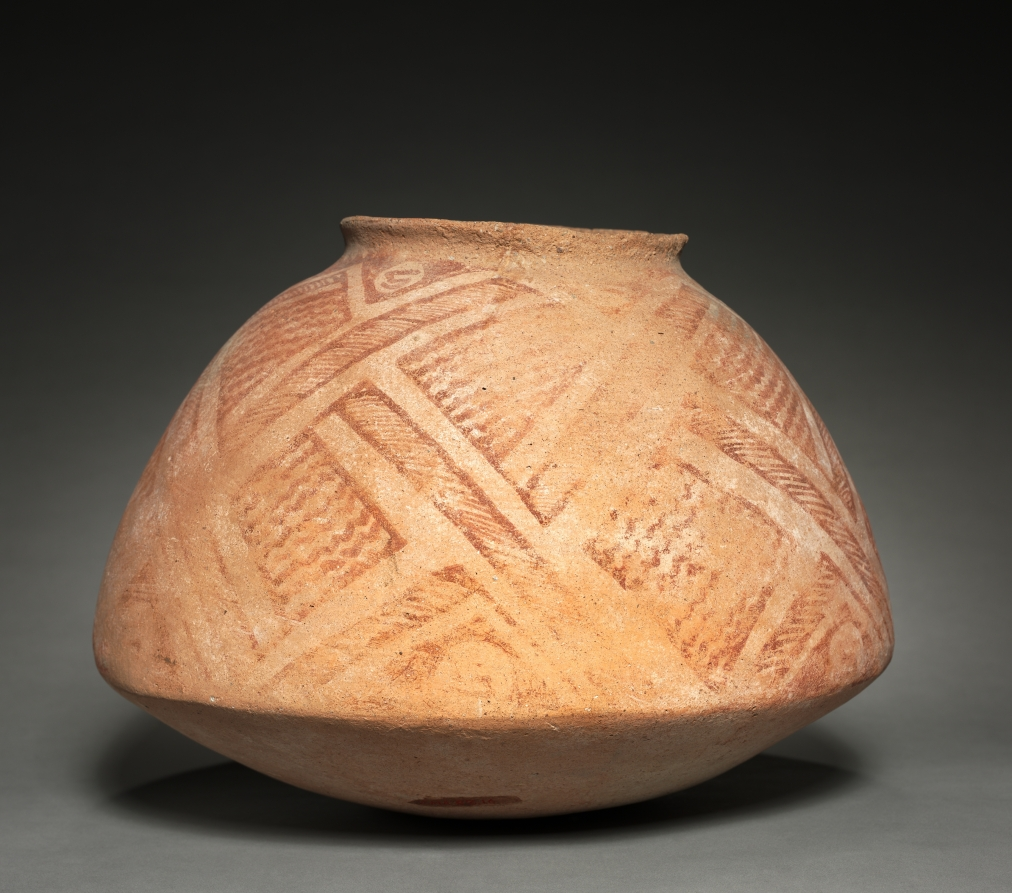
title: Large Storage Jar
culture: Southwest, Arizona, Hohokam, 10th-11th century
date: c. 900–1100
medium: Ceramic, slip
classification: Ceramic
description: The Hohokam Arizona were accomplished agriculturalists whose decline after 1350 was caused partially by drought, and then flooding that overcame irrigation canals. Many Hohokam settlements boasted large public structures including platform mounds and oval ballcourts. The latter reveal contact with Mexico, where the ballgame was a long-established tradition.